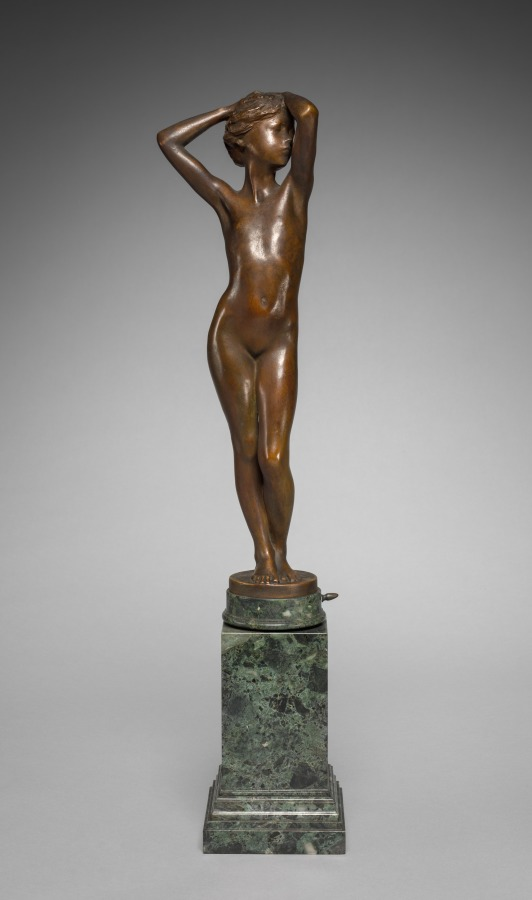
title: Eva, Study of a Nude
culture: America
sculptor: Emil Fuchs (American, born Austria, 1866–1929)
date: 1913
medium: bronze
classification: Sculpture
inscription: Signed on base: EMIL FUCHS 1913